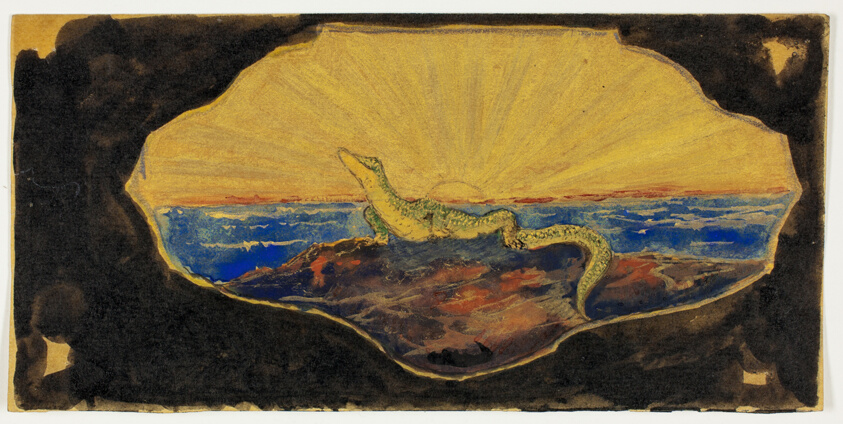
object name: Drawing and Watercolor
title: Untitled Drawing for Frame Cartouche (Salamander)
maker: Theodore Roussel (French, worked in England, 1847-1926)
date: 1899/1908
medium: Brush and black ink, gold metallic ink, and watercolor on semi-transparent tan wove paper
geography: England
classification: watercolor; prints and drawing; paper